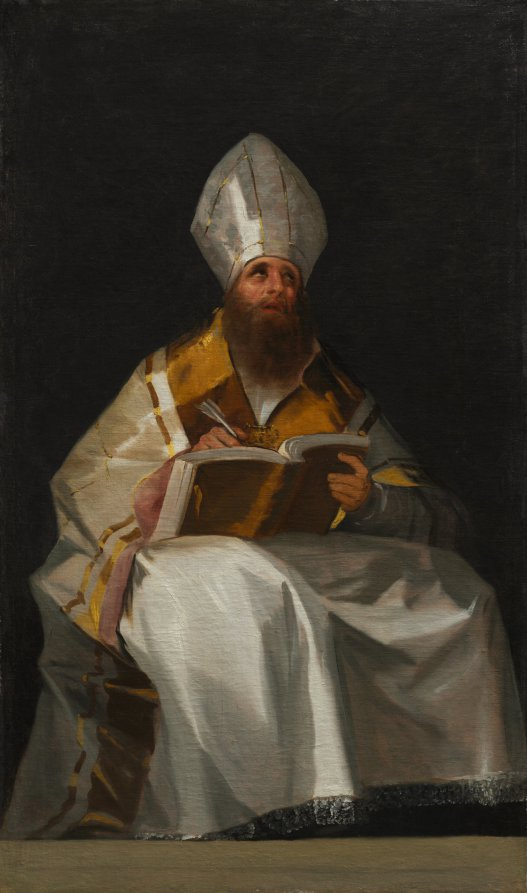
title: Saint Ambrose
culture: Spain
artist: Francisco de Goya (Spanish, 1746–1828)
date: c. 1796–99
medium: oil on canvas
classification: Painting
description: This work belongs to a series depicting Ambrose, Jerome, Augustine, and Gregory, key figures of early Catholicism. Saint Ambrose (about AD 340–391), the bishop of Milan, resolved important theological conflicts within the church and worked effectively with advocates of Roman paganism. The low viewpoint and large scale suggest that this painting hung high on the wall of a religious institution, but its original location remains unknown. In the late 1700s, Spain expelled all the Jesuits and sparked a transformation of the church. Many of these reformers turned back to early church history for inspiration, and this painting was probably commissioned by one of these new organizations.